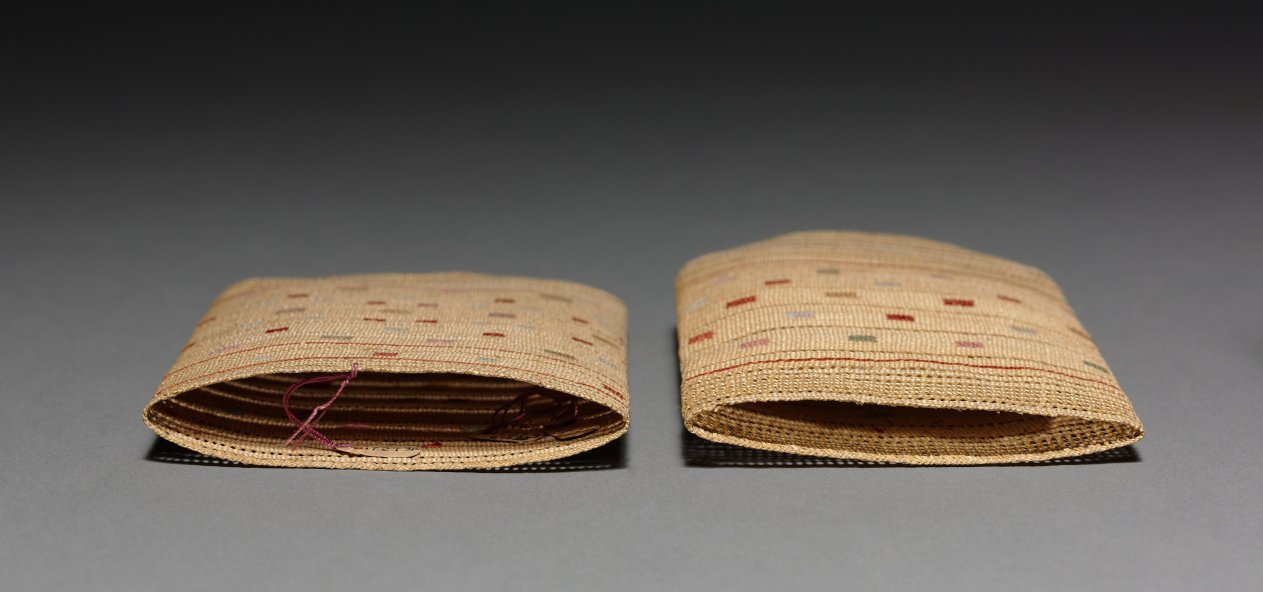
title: Cigarette or Needle Case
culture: Arctic, Aleut, Attu, Post-Contact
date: c 1875– 1917 (source unknown)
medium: plain twine, wild rye grass with crossed openwork, patterned twined start, intersecting layered spokes, and plaited finish; silk embroidery (catalogue card)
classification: Basketry